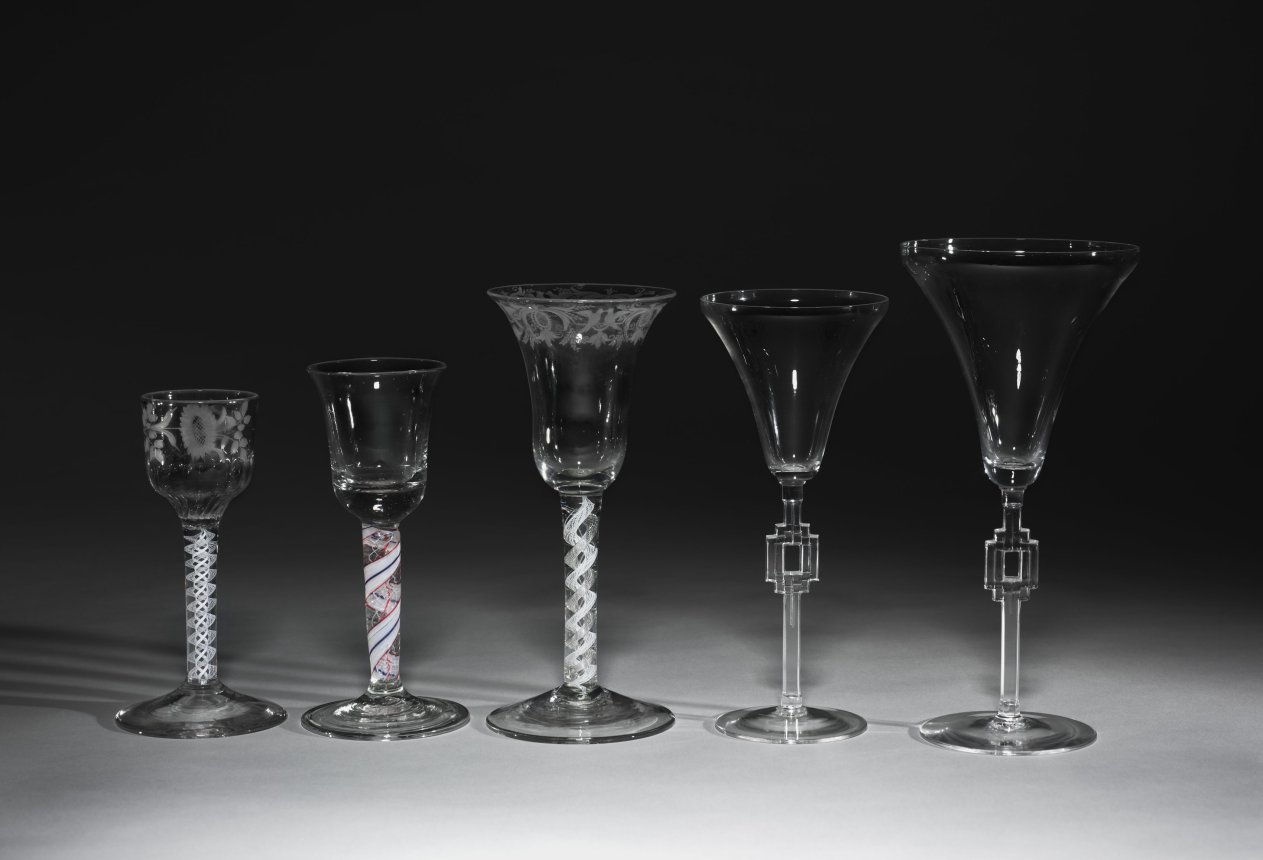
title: Wine Glass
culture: France, 20th century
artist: René Lalique (French, 1860–1945)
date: 1925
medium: glass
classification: Glass